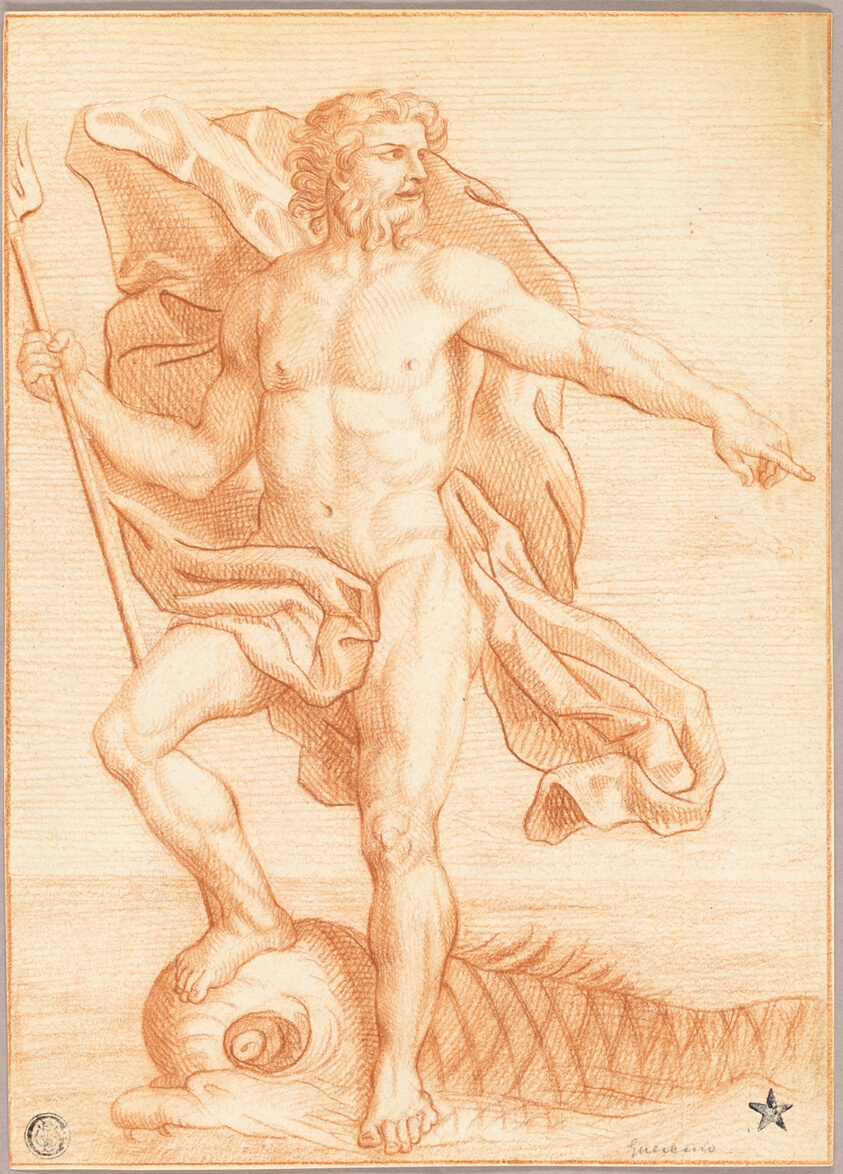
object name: Drawing and Watercolor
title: Neptune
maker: Follower of Charles Le Brun (French, 1619-1690)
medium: Red chalk on cream laid paper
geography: France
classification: chalk; paper; drawings (visual works); prints and drawing